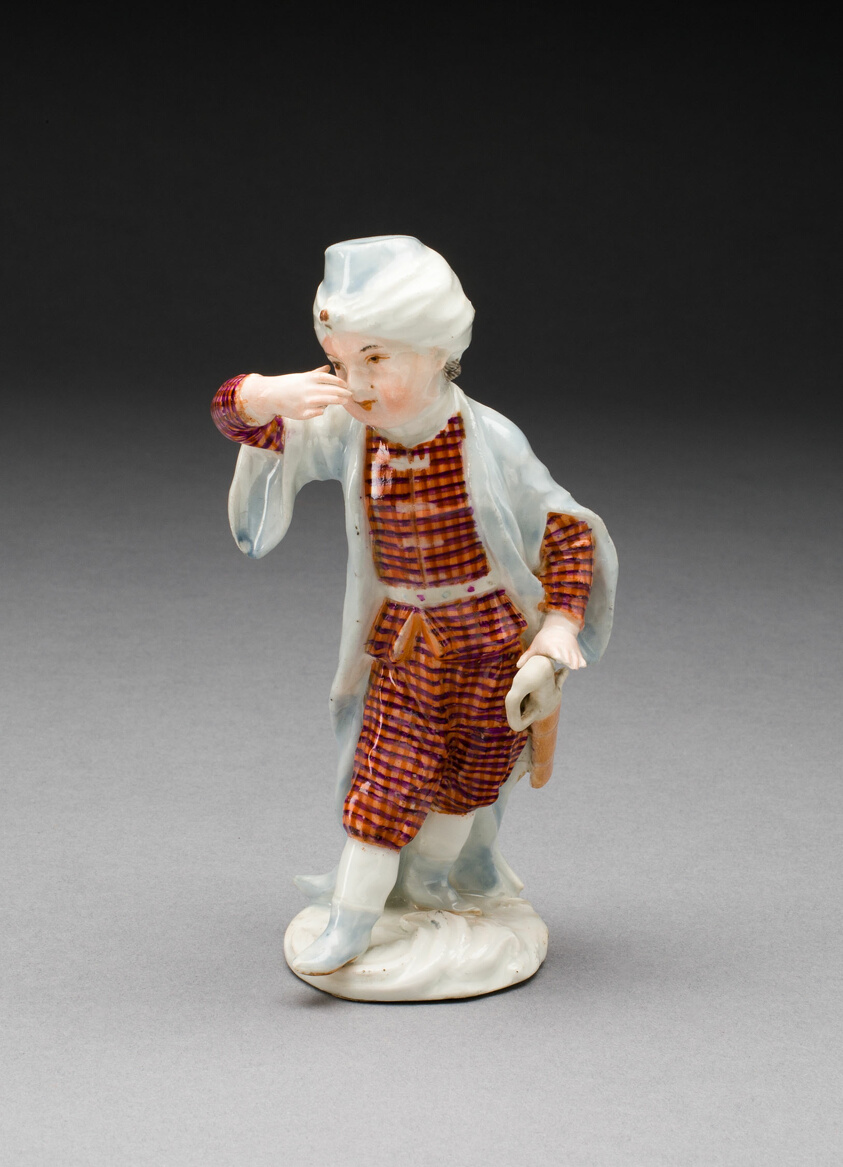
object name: Ceramics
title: Turkish Boy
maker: Germany, Hessen-Kassel (Landgraviate)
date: c. 1770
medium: Hard-paste porcelain and polychrome enamels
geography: Hesse-Kassel (Landgraviate) (historic region)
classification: sculpture; porcelain; european decorative arts; ceramics